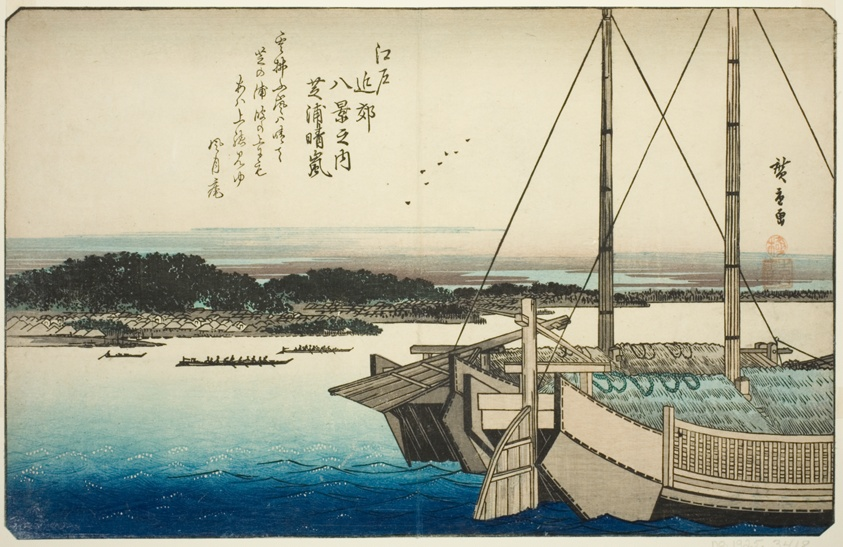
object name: Print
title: Clearing Weather at Shibaura (Shibaura seiran), from the series "Eight Views in the Environs of Edo (Edo kinko hakkei no uchi)"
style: Japanese (culture or style)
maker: Utagawa Hiroshige 歌川 広重; Japanese, 1797-1858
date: c. 1837/38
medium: Color woodblock print; oban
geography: Japan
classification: woodblock print; print; asian art